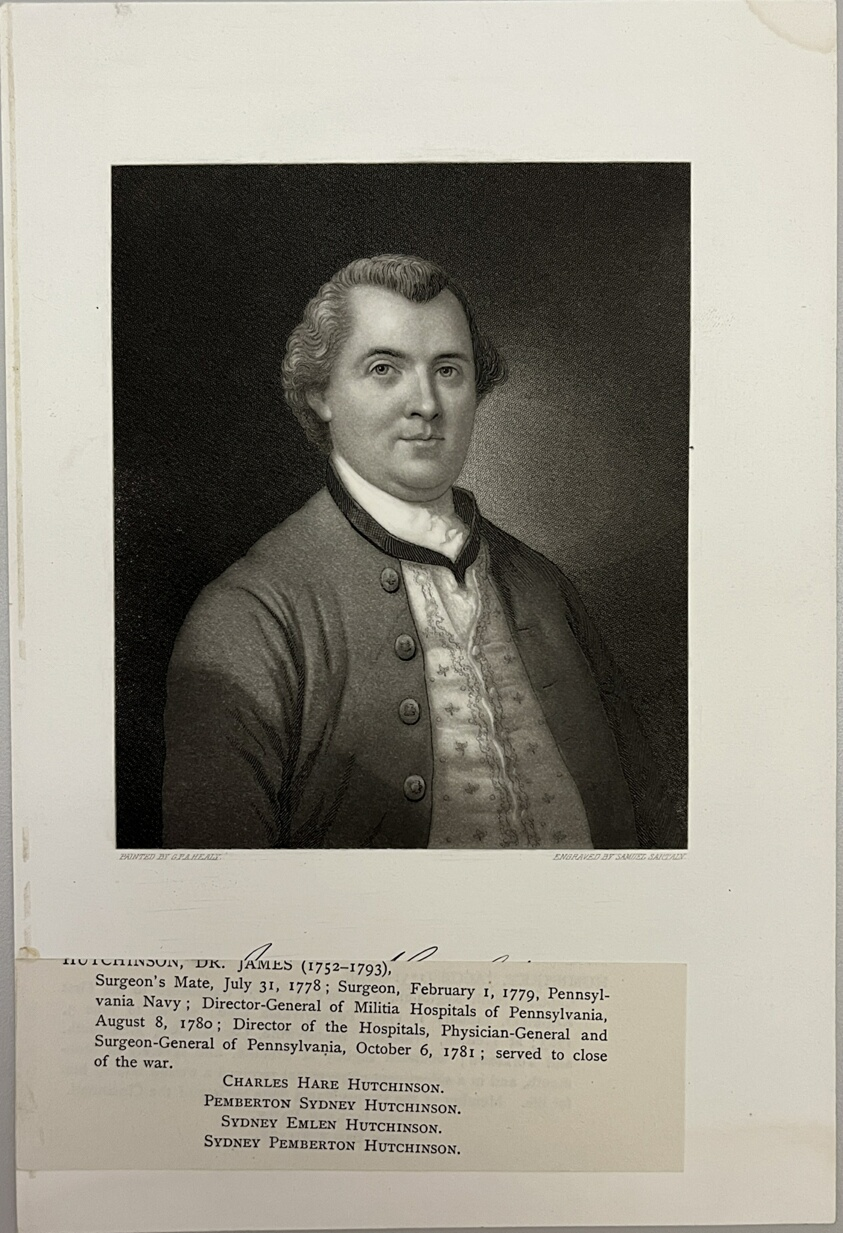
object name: Print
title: James Hutchinson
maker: Samuel Sartain (American, 1830-1906); after George Peter Alexander Healy (American, 1813-1894)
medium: Engraving on paper with text attached to recto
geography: United States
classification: reproduction; print; prints and drawing